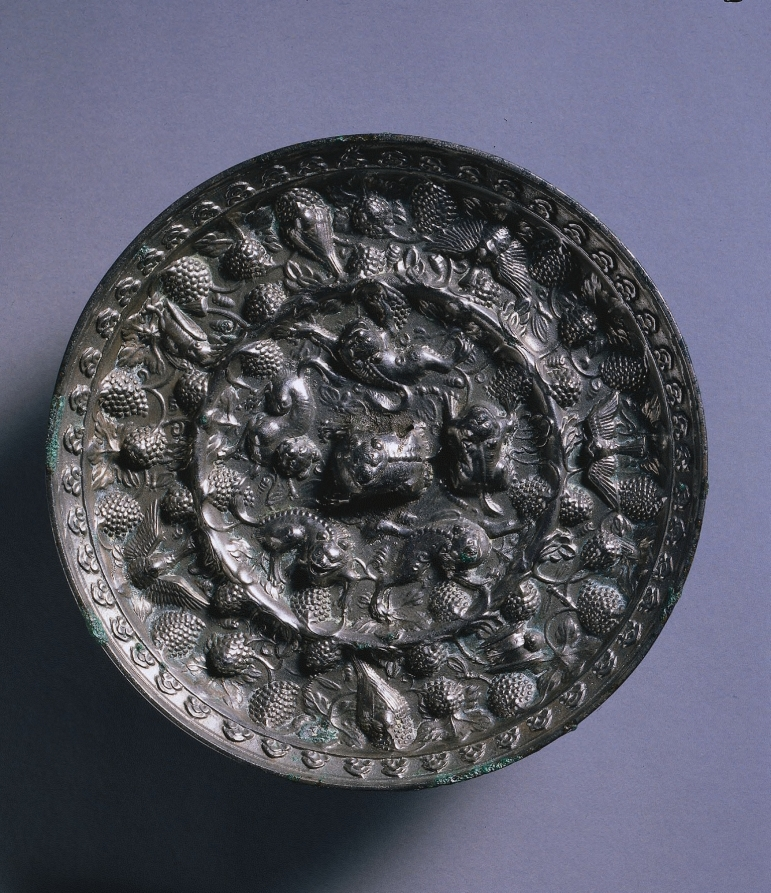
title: Animal-and-Grape Mirror with a Variety of Birds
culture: China, Tang dynasty (618-907)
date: late 600s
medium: bronze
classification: Metalwork